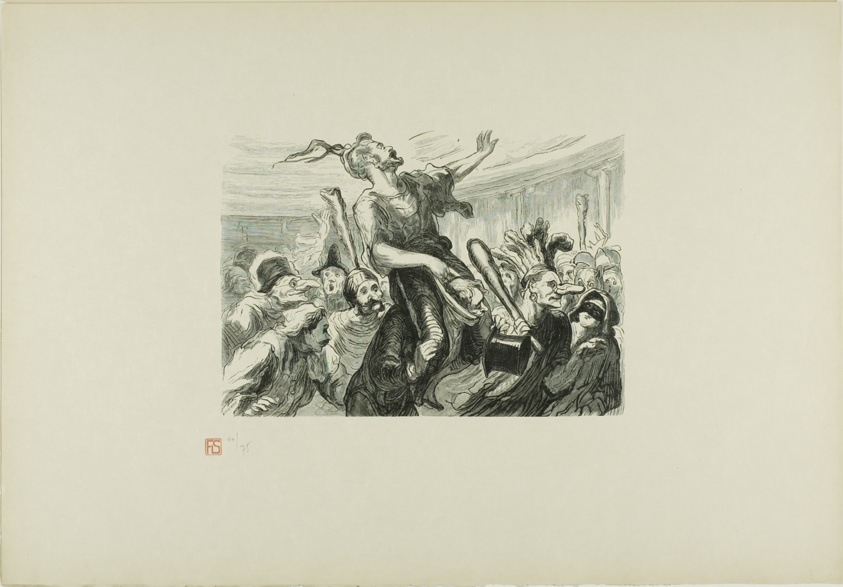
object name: Print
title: At the Opera Ball - Lent - Long live the smartly dressed crowd!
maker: Etienne (French, 19th century); after Honoré Victorin Daumier (French, 1808-1879); printed by François Louis Schmied (Swiss, 1873-1941); published by Jules Meynial (French, 20th century)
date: 1868, printed 1920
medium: Wood engraving on cream Japanese paper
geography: France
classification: wood engraving; print; prints and drawing